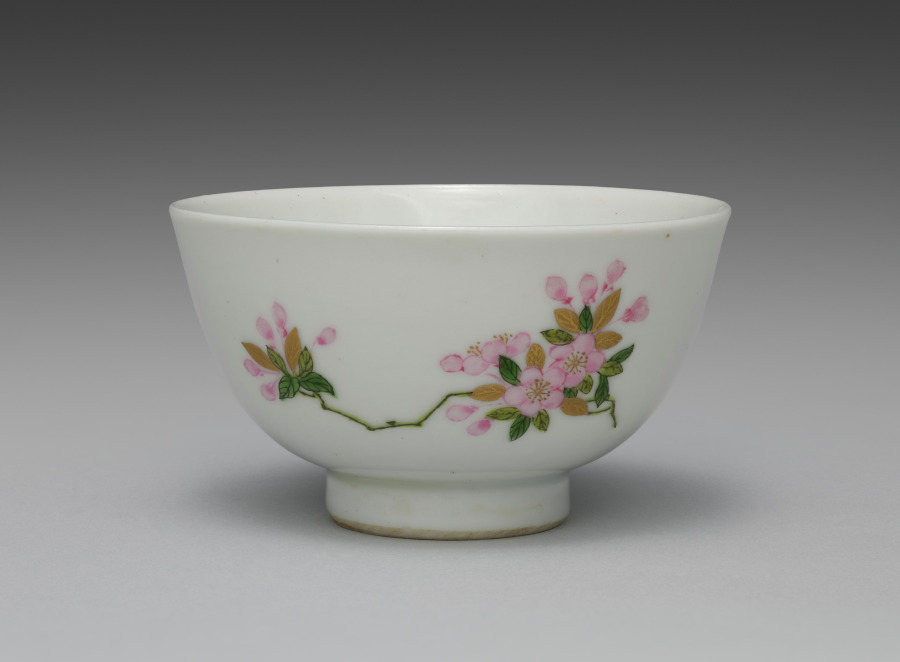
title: Teabowl from Teabowls with Peony and Crabapple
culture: Japan, Meiji period (1868–1912)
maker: Seifū Yohei III (Japanese, 1851–1914)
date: 1893–1914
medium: One from a set of five teabowls; porcelain with underglaze and overglaze color enamels and gold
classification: Ceramic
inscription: 清風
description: Overglaze color enamels are generally called iro-e (literally “color picture”) in the terminology customarily used for porcelain decoration of the Edo period. This set of teabowls is a fine example of Yohei III’s skilled use of the technique, which is identified on this set’s box lid with the alternate phrasing “porcelain with color painting” (jisaiga). Distinct from the way overglaze colors were used in Kakiemon ware from Arita, his designs and applications show a consciousness of porcelain decoration of the Qing dynasty. Here, he combines Chinese models with a sensibility taken from Kyoto ware precedents, including painting with powdered gold (kinrande). The colors used in the bowls are as follows: blue, black, gold, white, light green, green, and pink. The black iron, used for stems and leaf veins, is painted over the glaze. The gold, also painted over the glaze, is used for leaves and the centers of flowers, for solid, glossy lines defining detail, or as a semimatte ground. The white of the peony flower is built up to a low relief over the glaze. Yohei has incised lines of varying widths into the pigment, carving away to the bowl’s surface, to differentiate individual petals and their rippled shapes. The light and dark greens, as well as the pink, are painted over the glaze. Of note is how Yohei has first used thinly applied lines of light green to draw the plum branch before applying the opaque iron black. For the plum buds and flowers, he has used a diluted pink with an opaque pink for outline, both over the glaze. In his later works, Yohei used pink both over and under the glaze in a manner similar to underglaze blue, and it can be challenging in some cases to discern which technique he has used. A lidded container in a private collection has a similar design but is augmented with the inclusion of white and purple magnolia blossoms. In contemplating the original decorative program of a set, of which these teabowls may have been a part, it is worth considering that perhaps not all objects included the full range of motifs. In such cases, the composition of the individual object may be best understood within the context of the extended ensemble. Here, the delicate pink plum on one side of the bowl seems slightly unbalanced with the bold white peony on the other, but when seen with other objects with the magnolia and its additional colors and shapes, it is possible to imagine a set with a complex, balanced design across multiple pieces.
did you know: Blue appears only inside the footring, as a double band of underglaze color.